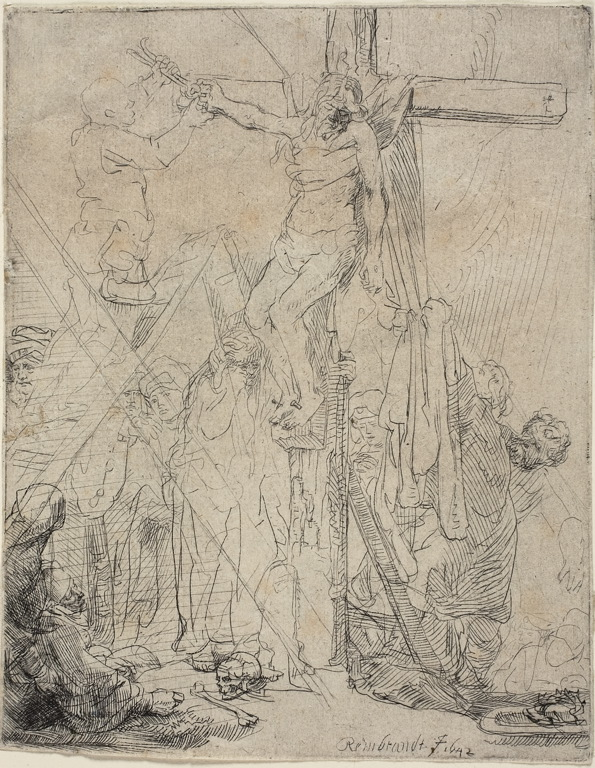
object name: Print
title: The Descent from the Cross: A Sketch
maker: Rembrandt van Rijn (Dutch, 1606-1669)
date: 1642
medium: Etching and drypoint on white laid paper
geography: Holland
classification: etching; print; prints and drawing; paper; drypoint